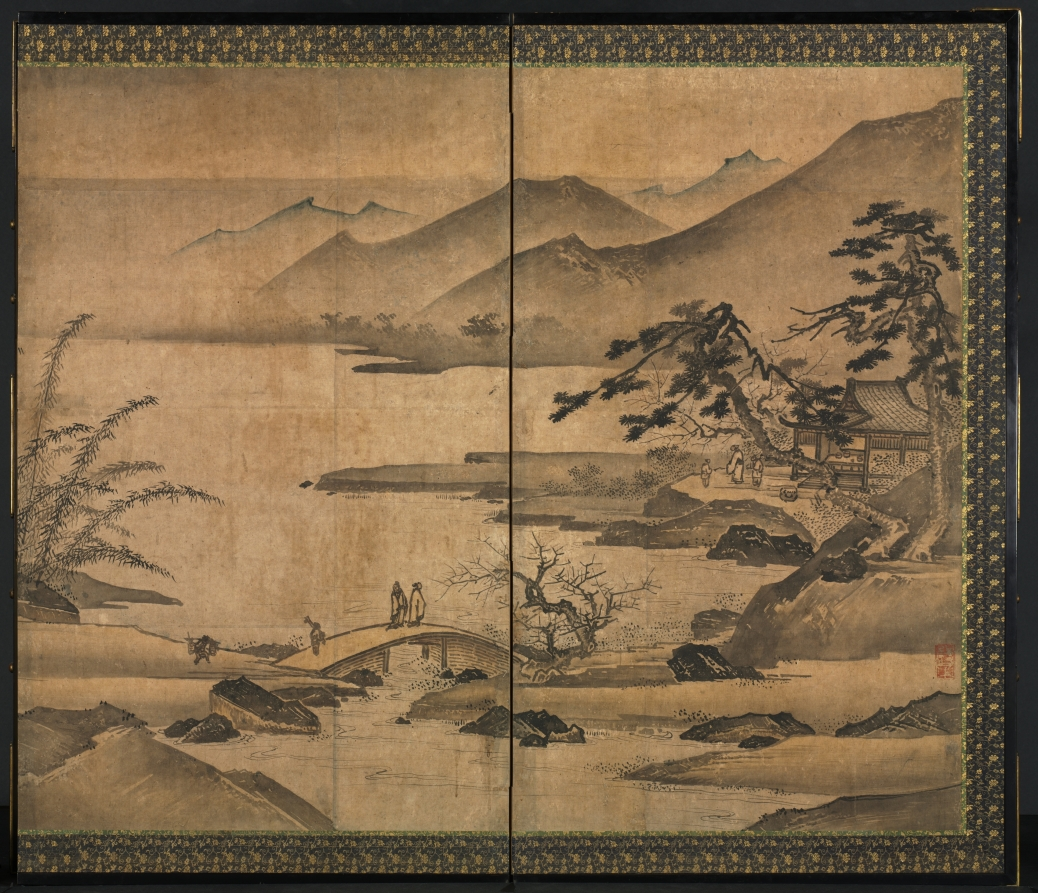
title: Landscape of the Four Seasons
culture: Korea, Joseon period (1392–1910) or Japan, Muromachi period (1392–1573)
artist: Yi Sumun (Korean, b. c. 1404)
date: late 1400s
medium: One of a pair of six-panel screens; ink and slight color on paper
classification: Painting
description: Yi Sumun is believed to have been a Korean painter who migrated to Japan in 1424 at the age of 20. This pair of screens is the artist’s most important composition in this format. Viewed from right to left, the screens show the passage of the four seasons, a popular theme in medieval Japanese ink painting.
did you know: Yi Sumun is believed to have been a 15th-century Korean man who moved to Japan at age 20 and became an influential landscape painter in Japan.